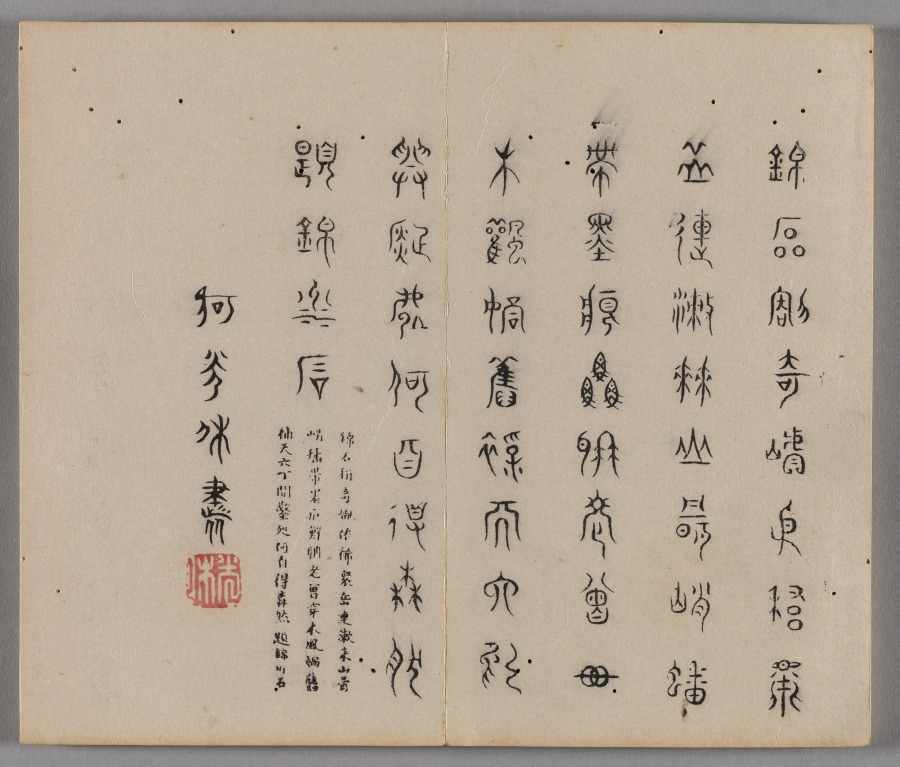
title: Ten Bamboo Studio Painting and Calligraphy Handbook (Shizhuzhai shuhua pu): Rocks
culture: China, Qing dynasty (1644-1911)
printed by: Hu Zhengyan (Chinese, c. 1584–1674)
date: 1633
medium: Woodblock-printed book; ink and colors on paper; first edition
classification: Print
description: Color printing reached a level of perfection in the early 1600s, as seen in this Ten Bamboo Studio Collection of Calligraphy and Painting and the Mustard Seed Garden Manual of Painting (printed 1679 and 1701). The painterly quality, precision in registering (aligning) the woodblocks, and harmonious colors made them the most successful color print editions in Chinese history. Both editions were printed and compiled in Nanjing, spread nationwide, and had a great impact on the arts in Japan and Korea.